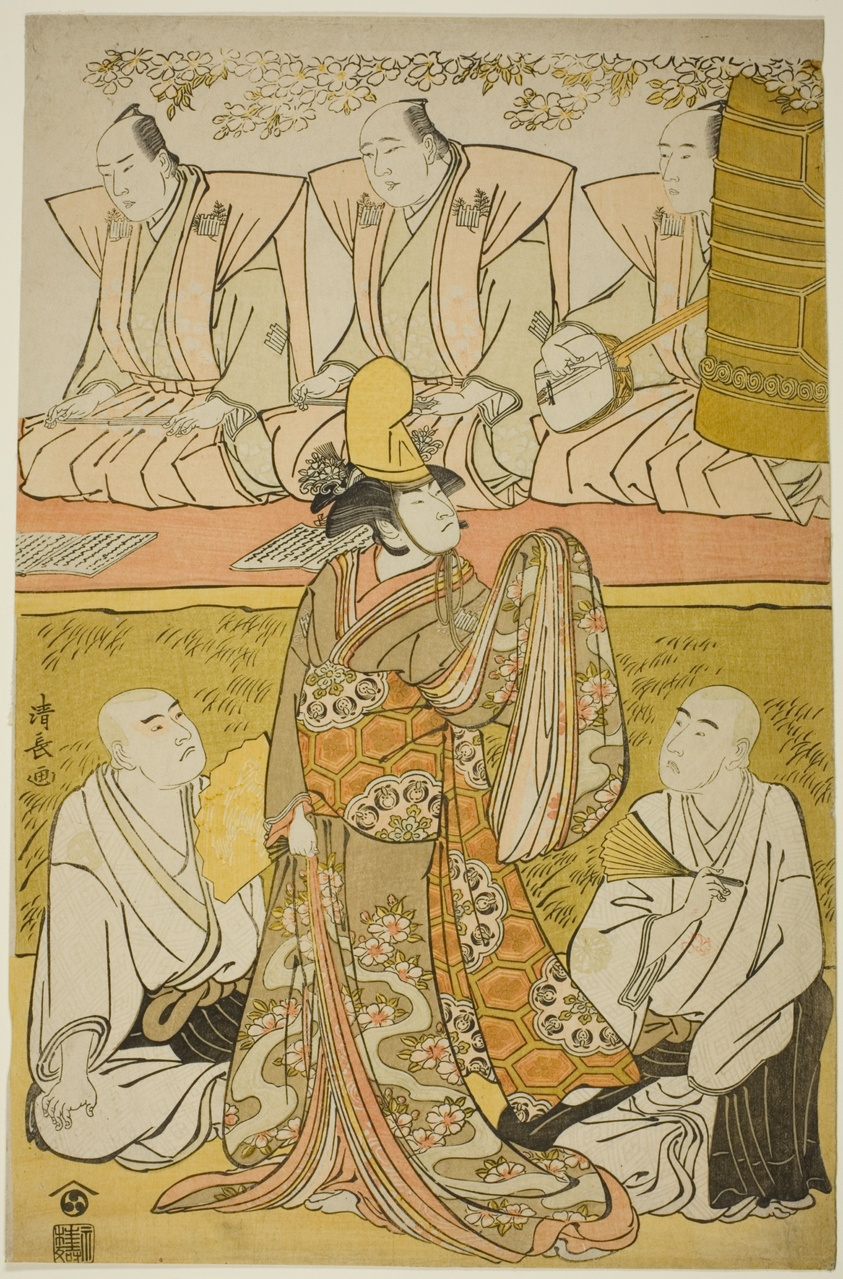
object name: Print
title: The Actor Nakamura Nakazo I as the Shirabyoshi Katsuragi, Matsumoto Koshiro IV as the monk Meigetsubo, and Otani Hiroji III as the monk Izayoibo, in the play "Edoganoko Musume Dojoji," performed at the Ichimura Theater in the eighth month, 1783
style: Japanese (culture or style)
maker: Torii Kiyonaga (Japanese, 1752-1815)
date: 1783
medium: Color woodblock print; oban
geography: Japan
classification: woodblock print; print; asian art